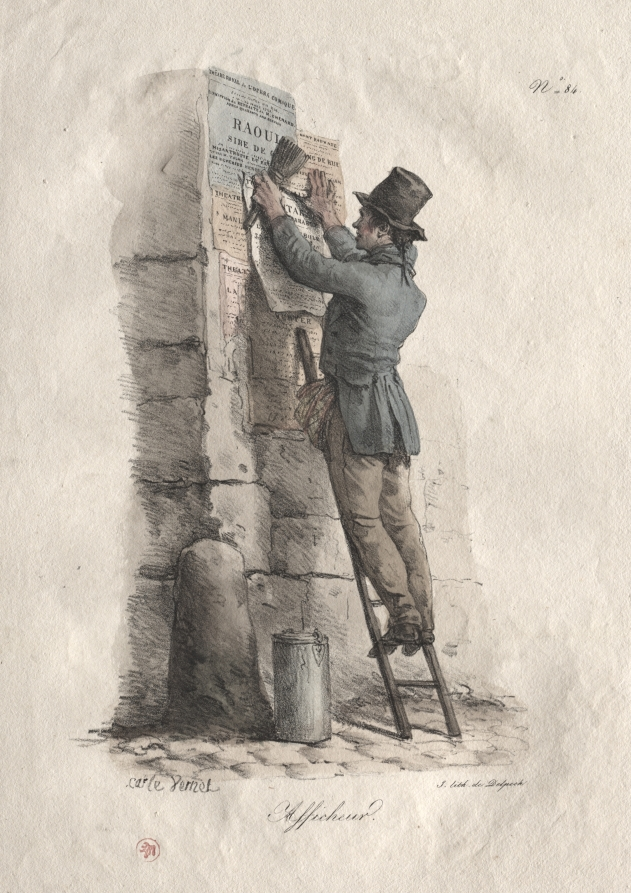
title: Bill Poster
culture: France, 19th century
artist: Carle Vernet (French, 1758–1836)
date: c. 1780–1836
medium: lithograph, hand colored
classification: Print